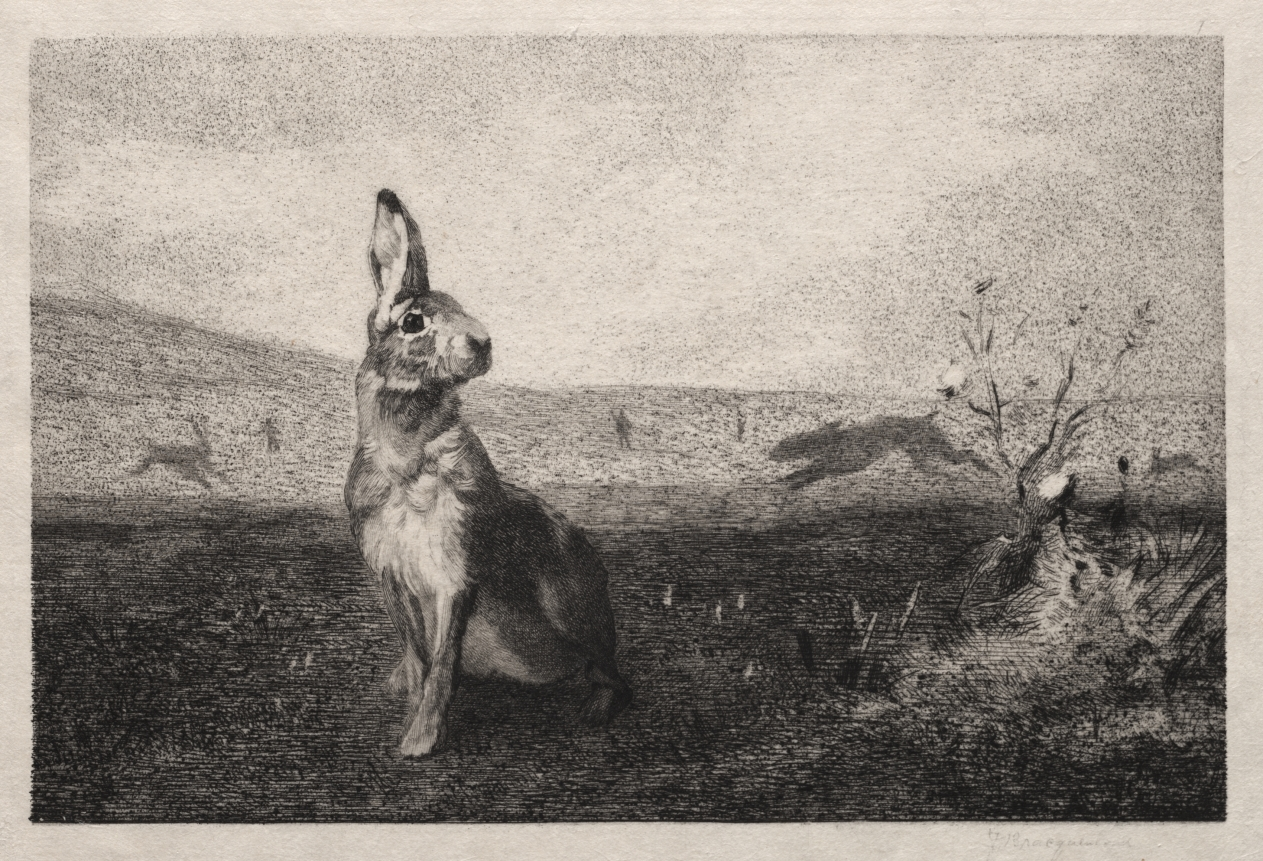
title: The Hare (after A. de Balleroy)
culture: France, 19th century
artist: Félix Bracquemond (French, 1833–1914)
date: 1865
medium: softground and drypoint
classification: Print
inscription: lower right, in pencil: F. Bracquemond